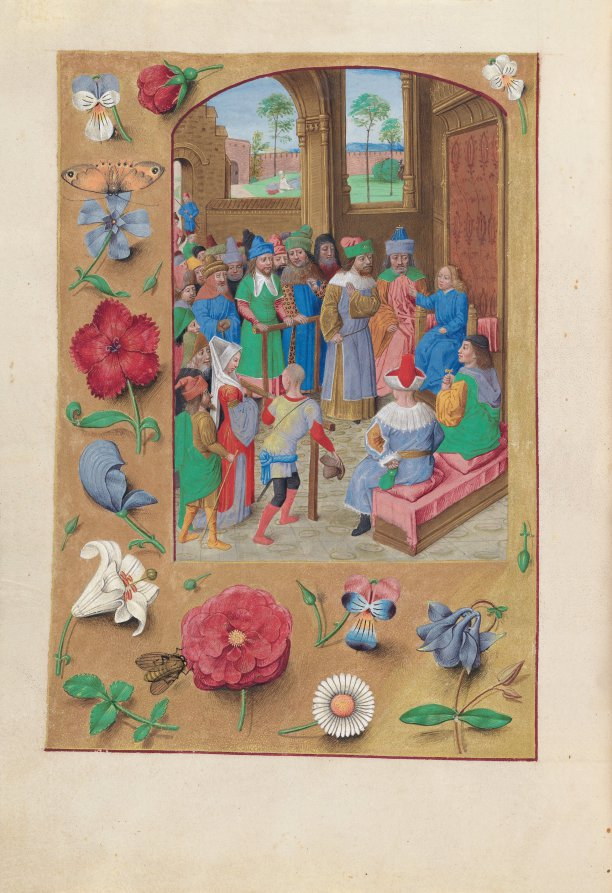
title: Hours of Queen Isabella the Catholic, Queen of Spain: Fol. 195v, St. Suzanne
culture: Flanders, Ghent and Bruges, late 15th century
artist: Master of the First Prayerbook of Maximillian (Flemish, c. 1444–1519)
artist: and Associates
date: c. 1500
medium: ink, tempera, and gold on vellum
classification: Bound Volume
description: This manuscript was illuminated by a circle of at least five highly organized manuscript painters active in the Flemish cities of Ghent and Bruges. The principal illuminator was Alexander Bening, who painted the majority of the book's miniatures. Manuscripts produced by this circle of artists are renowned for the decoration of their borders, which typically feature a rich variety of realistically-painted flowers, birds, and butterflies. This prayer book, called a book of hours, was intended not for a cleric, but for the private devotions of a lay person-in this case, Isabella the Catholic, Queen of Spain (1451-1504). Isabella's coat of arms embellishes the book's frontispiece. It is unlikely that the book was commissioned by the Queen herself; rather, she probably received it as a diplomatic gift from someone courting her patronage, perhaps Cardinal Francisco Jimenez de Cisneros. A Franciscan friar, Jimenez was dependent upon Isabella for his advancement, first to the post of Queen's confessor in 1492, and then to Archbishop of Toledo in 1495.